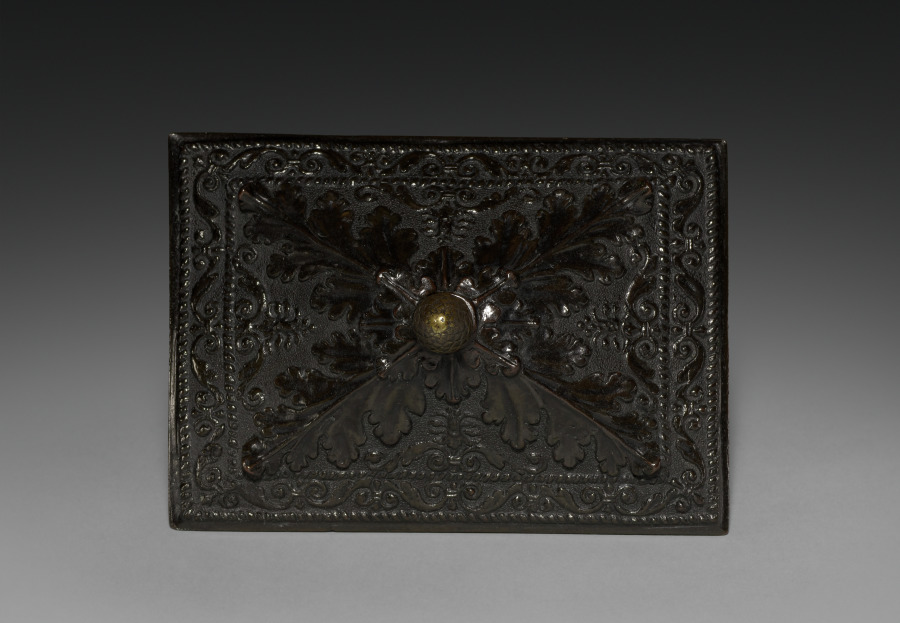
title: Writing Casket (lid)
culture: Italy, Ravenna, 16th century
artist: workshop of Severo da Ravenna (Italian, c.1496–c.1543)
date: c. 1525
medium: bronze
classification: Sculpture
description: The interior is divided into four compartments for storing writing implements and sand for blotting.